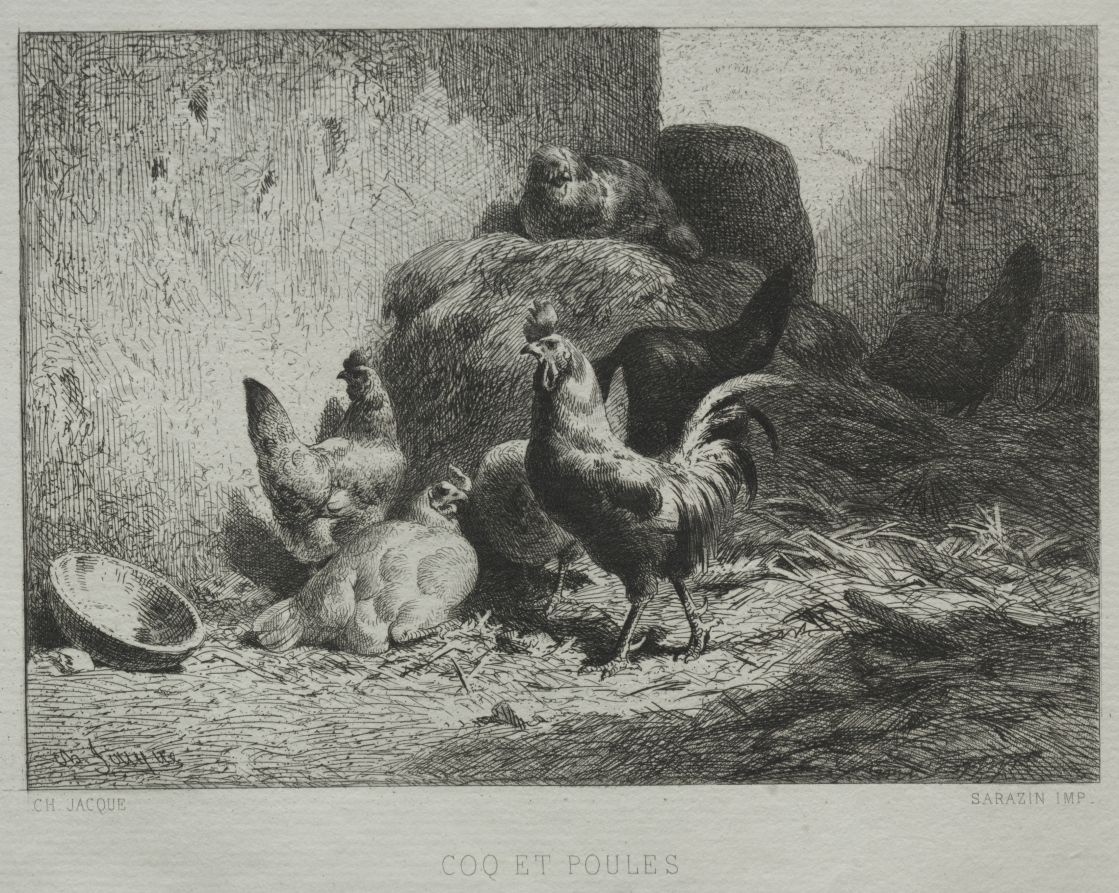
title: Cock and Hens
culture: France, 19th century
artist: Charles-Émile Jacque (French, 1813–1894)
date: 1864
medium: etching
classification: Print